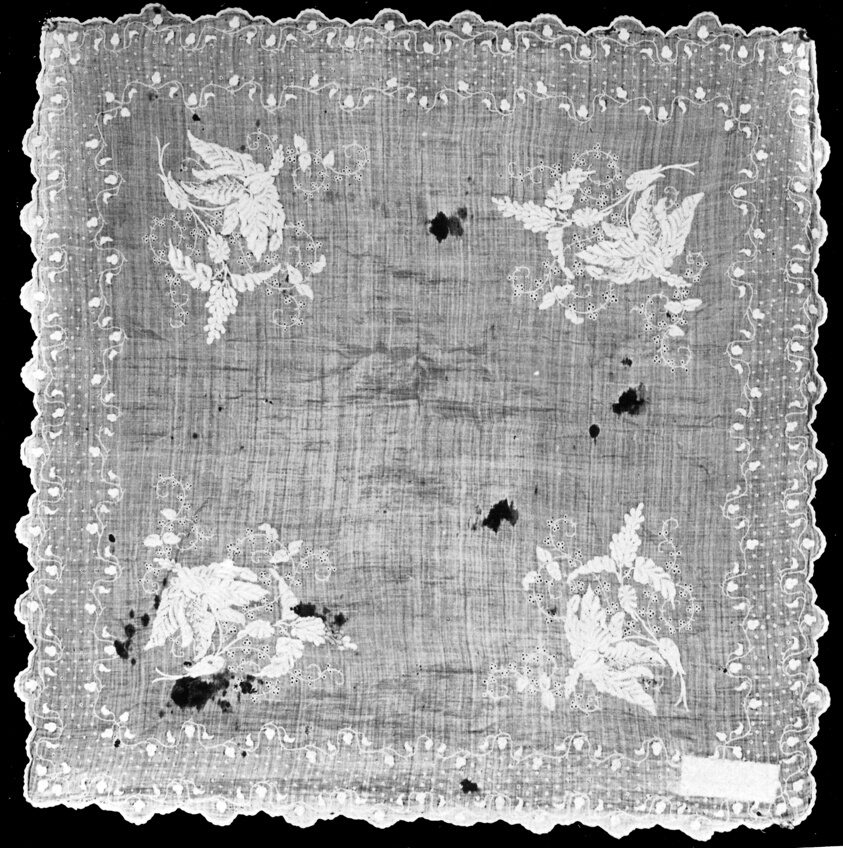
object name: Textile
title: Handkerchief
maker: France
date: 1825/75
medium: Linen, plain weave; embroidered with cotton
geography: France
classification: textile; needlework (visual works); accessories (object genre); weaving